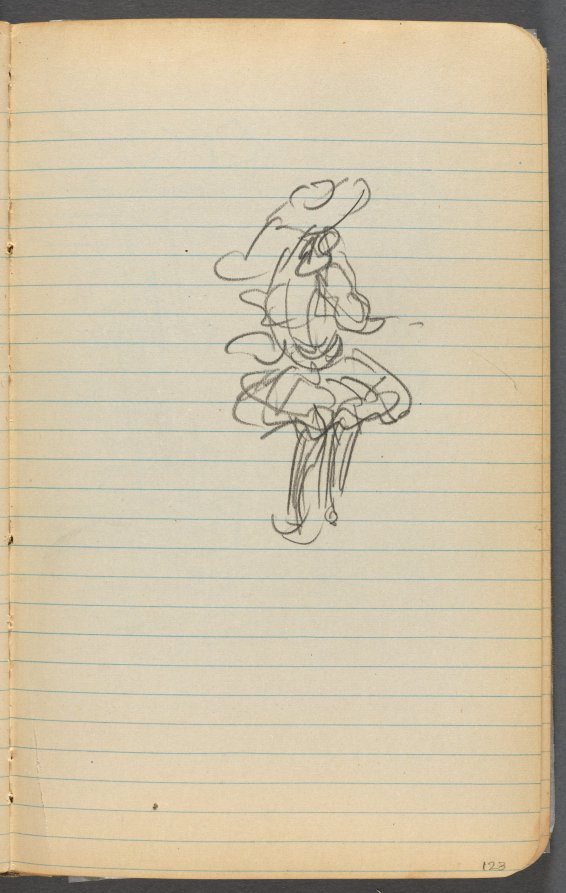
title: Sketchbook, page 123: Female Figure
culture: America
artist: Maurice Prendergast (American, born Newfoundland [now Canada], 1858–1924)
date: 1905–10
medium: graphite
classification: Bound Volume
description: This sketchbook contains 69 pages of drawings, a diary largely devoted to the state of the artist's health, and a three-page discourse on the nature of genius and ideas.